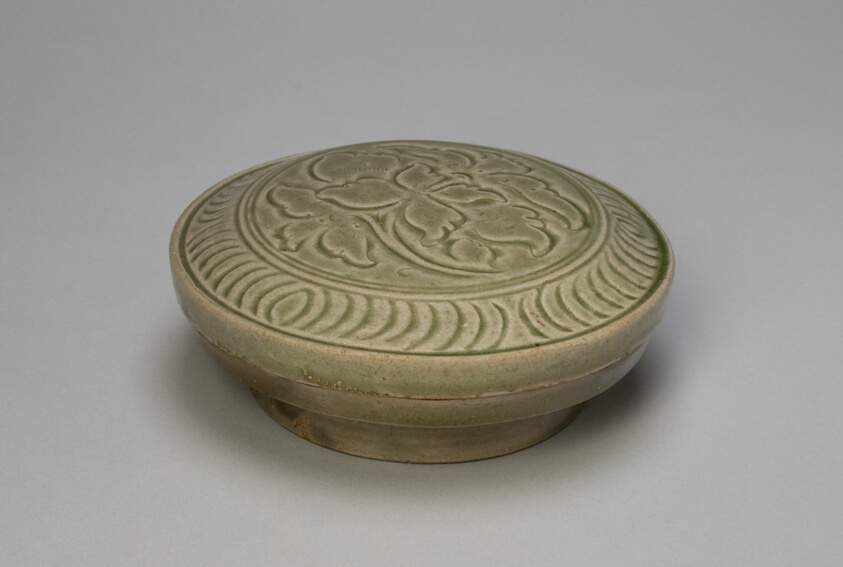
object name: Vessel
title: Covered Box with Peony Blossom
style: Chinese (culture or style)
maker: China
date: Tang dynasty (618–907), 9th century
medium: Yue ware; stoneware with underglaze carved decoration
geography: China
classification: stoneware; asian art; ceramics; vessel